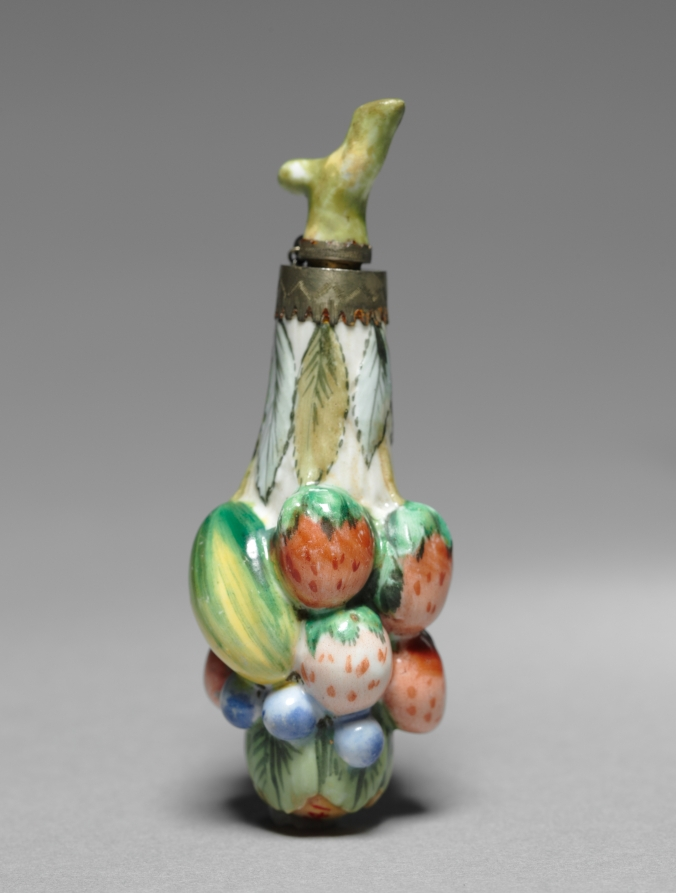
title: Scent Bottle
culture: Germany (?)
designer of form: copy after Chelsea Porcelain Factory (Britain, London, 1745–84)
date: 1800s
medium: porcelain with gilt metal mounts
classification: Miscellaneous